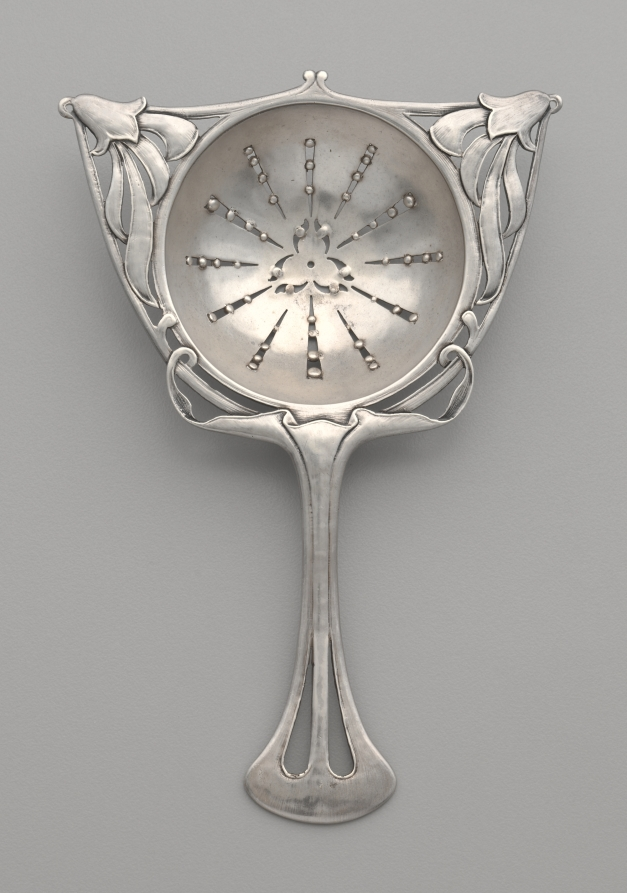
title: Tea Strainer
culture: America, Ohio, Cleveland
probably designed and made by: Horace Potter (1873–1948)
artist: and Potter Studios (American)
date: c. 1910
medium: silver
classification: Silver